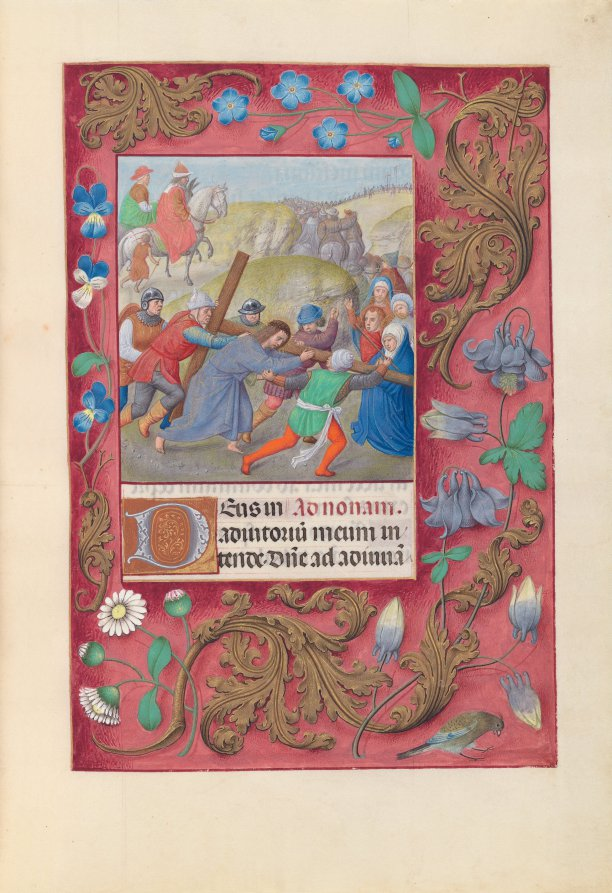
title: Hours of Queen Isabella the Catholic, Queen of Spain: Fol. 69r, Christ Carrying the Cross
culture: Flanders, Ghent and Bruges, late 15th century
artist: Master of the First Prayerbook of Maximillian (Flemish, c. 1444–1519)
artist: and Associates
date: c. 1500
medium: ink, tempera, and gold on vellum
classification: Bound Volume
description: This manuscript was illuminated by a circle of at least five highly organized manuscript painters active in the Flemish cities of Ghent and Bruges. The principal illuminator was Alexander Bening, who painted the majority of the book's miniatures. Manuscripts produced by this circle of artists are renowned for the decoration of their borders, which typically feature a rich variety of realistically-painted flowers, birds, and butterflies. This prayer book, called a book of hours, was intended not for a cleric, but for the private devotions of a lay person-in this case, Isabella the Catholic, Queen of Spain (1451-1504). Isabella's coat of arms embellishes the book's frontispiece. It is unlikely that the book was commissioned by the Queen herself; rather, she probably received it as a diplomatic gift from someone courting her patronage, perhaps Cardinal Francisco Jimenez de Cisneros. A Franciscan friar, Jimenez was dependent upon Isabella for his advancement, first to the post of Queen's confessor in 1492, and then to Archbishop of Toledo in 1495.